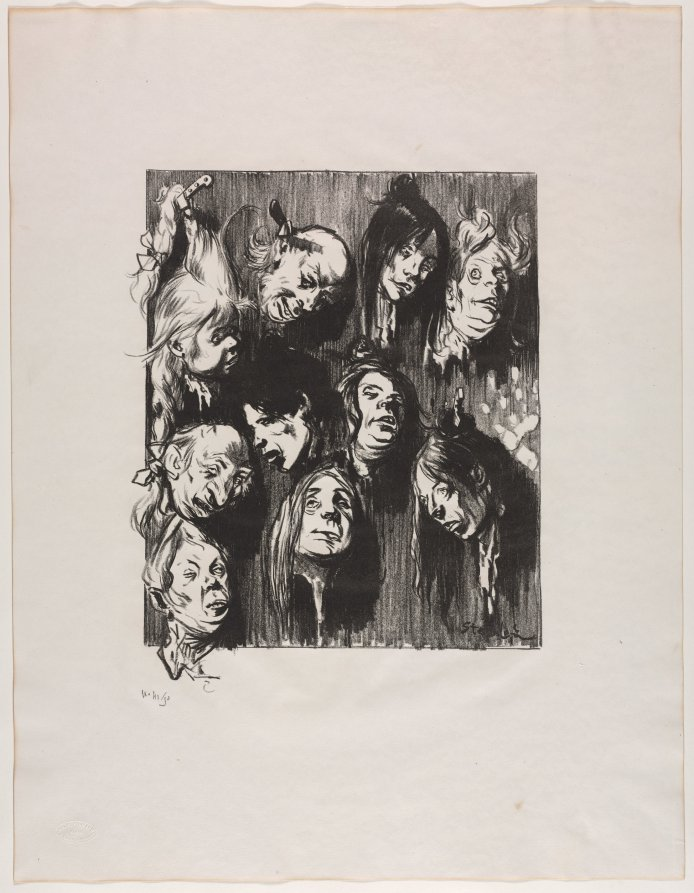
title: Ten Assassinations for a Penny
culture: Switzerland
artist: Théophile Alexandre Steinlen (Swiss, 1859–1923)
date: 1897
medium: lithograph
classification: Print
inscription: in pencil, lower left margin: No 41/50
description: Nineteenth-century French lithographs, including Steinlen’s charged political images, offer wide-ranging documentation of the life at the time. In 1881 France passed a law granting freedom of the press, resulting in numerous magazines of humor and social criticism. An advocate for the poor, the downtrodden, and the working classes, Steinlen contributed artwork to journals linked to the leftist movement, such as the anarchist publication La feuille (The Newspaper), in which Ten Assassinations for a Penny was reproduced. Steinlen’s illustrations for La feuille comment satirically on the articles written by Zo d’Axa, the editor-in-chief. A sense of gloom and violence that parallels the pessimism of the writing permeates the somber images. Marked by strong contrasts of black and white, Ten Assassinations for a Penny has an unsettling, even frightening quality intended to shock the reader into acknowledging the deep-seated problems in French society.